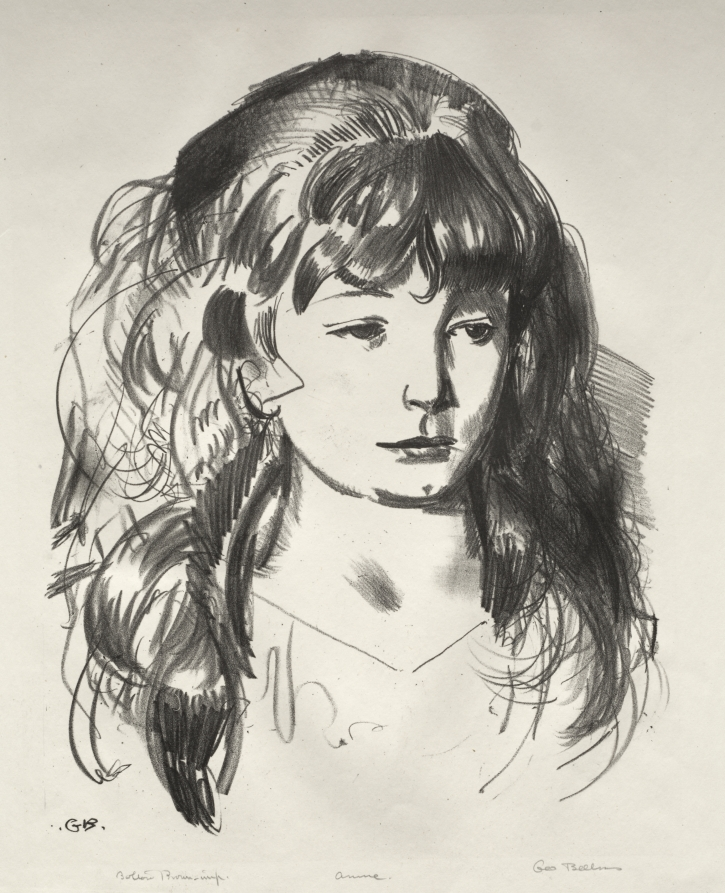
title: Sketch of Anne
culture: America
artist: George Bellows (American, 1882–1925)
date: 1924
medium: lithograph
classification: Print